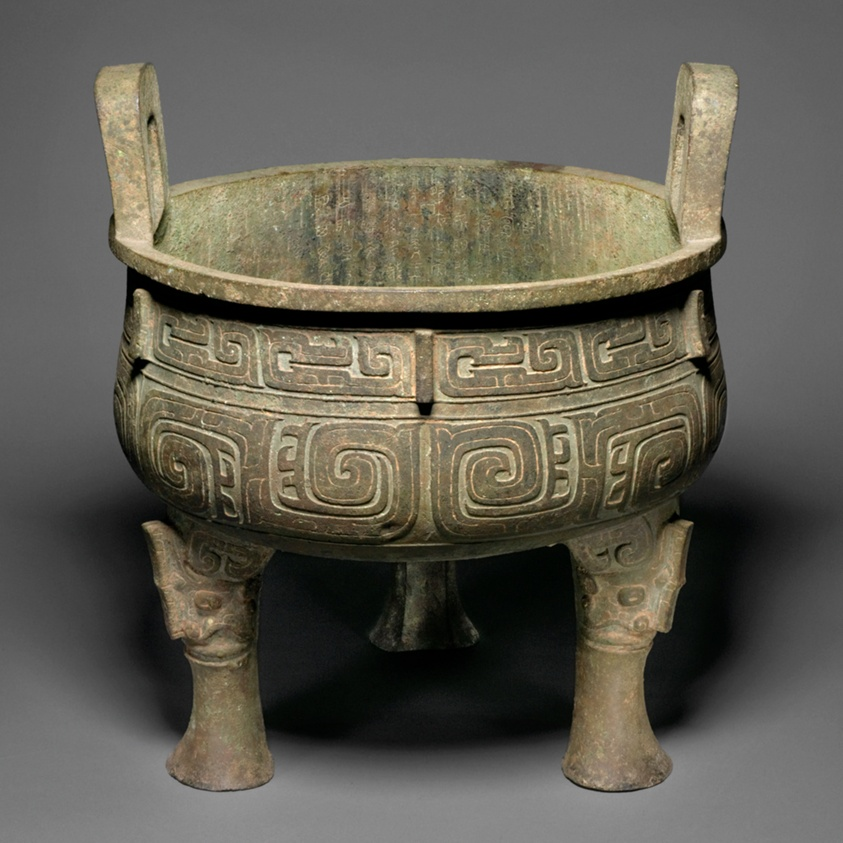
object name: Vessel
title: Cauldron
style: Chinese (culture or style), zhou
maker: China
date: Western Zhou dynasty (1046–771 BC ), early 9th century BC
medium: Bronze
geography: China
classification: vessel; bronze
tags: animals, swirl motifs, calligraphy